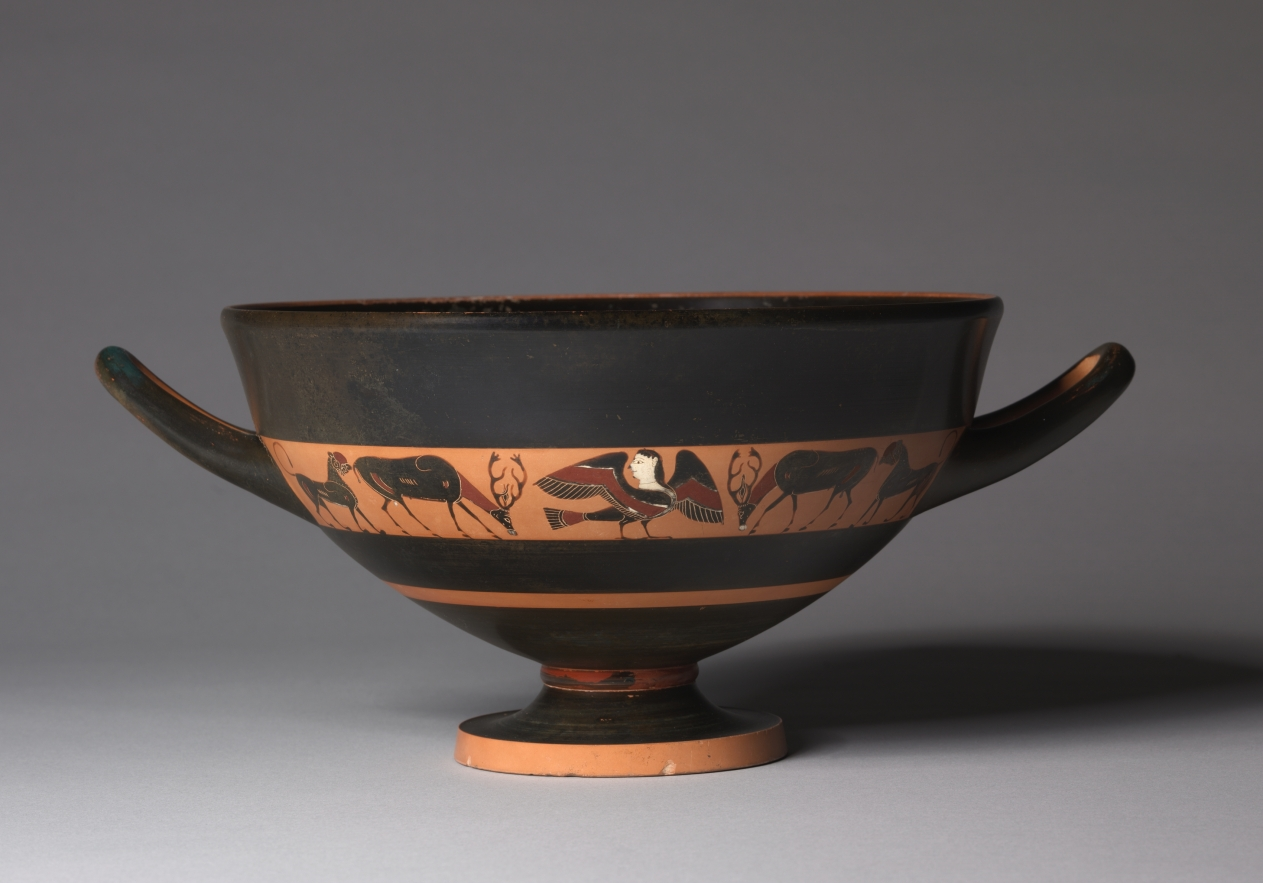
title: Black-Figure Band Skyphos (Drinking Cup): Sirens, Stags, and Panthers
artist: attributed to Group of Rhodes 11941 (Greek, Attic)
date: c. 540 BCE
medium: ceramic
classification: Ceramic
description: A siren, a mythological woman-headed bird, stands at the center of the figural band on either side of this cup, her wings spread and head turned to the left. Flanking her are a pair of grazing stags, with a panther on either side facing inward. Inside, the cup is sparsely decorated, its reserved tondo holding a dot within concentric circles.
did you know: Three of four stags on this cup each appear to have just one ear.